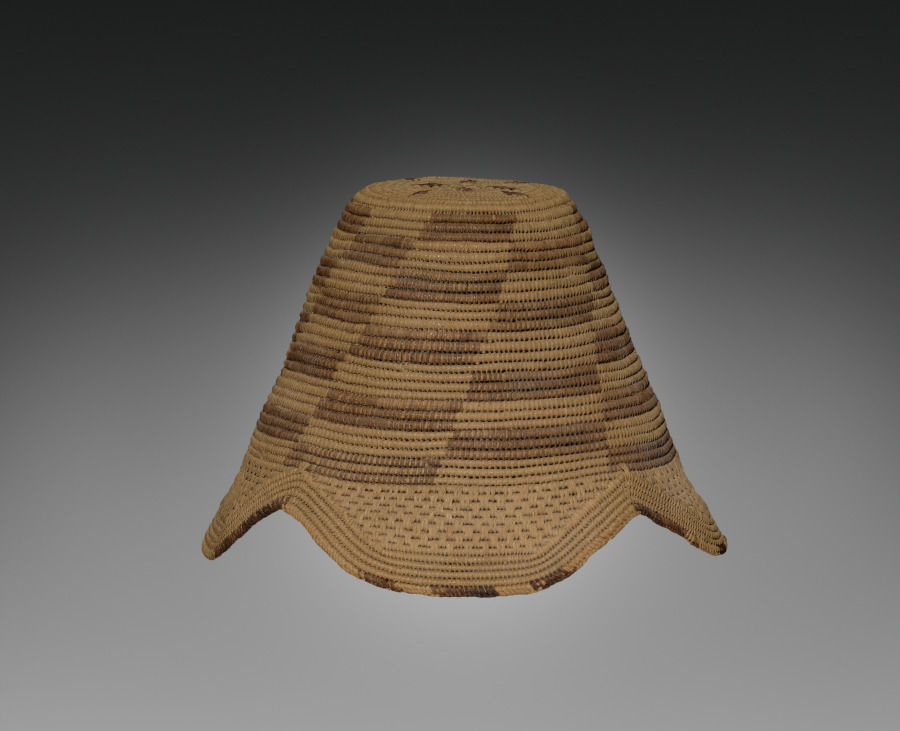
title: Hat (laket)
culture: Africa, Central Africa, Democratic Republic of the Congo, Kuba-style maker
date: early 1900s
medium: Raffia and dye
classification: Garment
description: Titled Kuba men and prominent women wear the laket, a small ornate dome-shaped hat. An essential fashion item of adult men in good social standing, it focuses special attention on the head as a significant marker of individual identity, ethnic affiliation, status, and role in society. This prestige object is secured on the crown of the head with a nine-and-a-half-inch metal pin that pierces through the hat onto a clump of hair. The laket is made from raffia palm fiber coiled into threads and woven in two alternating patterns and contrasting light and dark (dyed) wefts. There are two examples of the laket: the plain type with the flat top, and the more elaborate type called the laket mishiing.